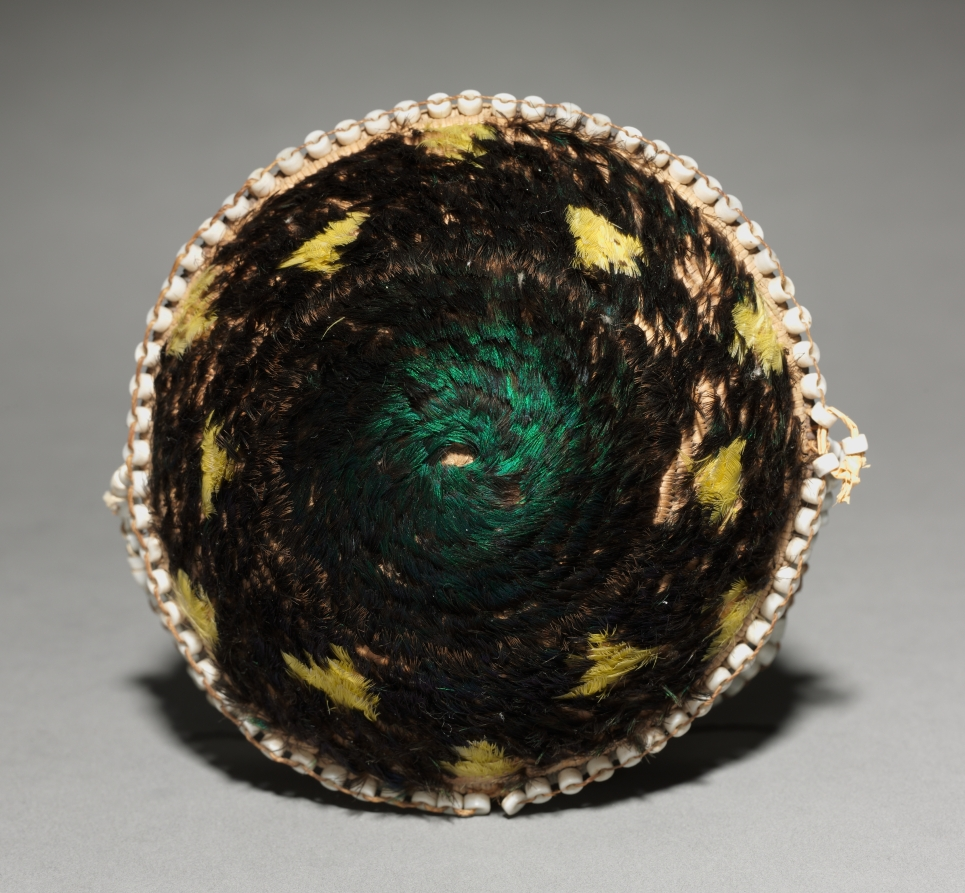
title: Gift Basket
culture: California, Pomo, late 19th- early 20th century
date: c. 1895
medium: Bulrush, Sedge with Mallard and Meadowlark Feathers, and clam shells; Coiled (3 rods)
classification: Basketry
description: Although this basket probably was not made for native use, the feathered basket is based on an older type that was exchanged among natives as a treasured gift on such occasions as ceremonies that marked the stages of life. The feathers and shell beads are symbols of prestige and wealth.